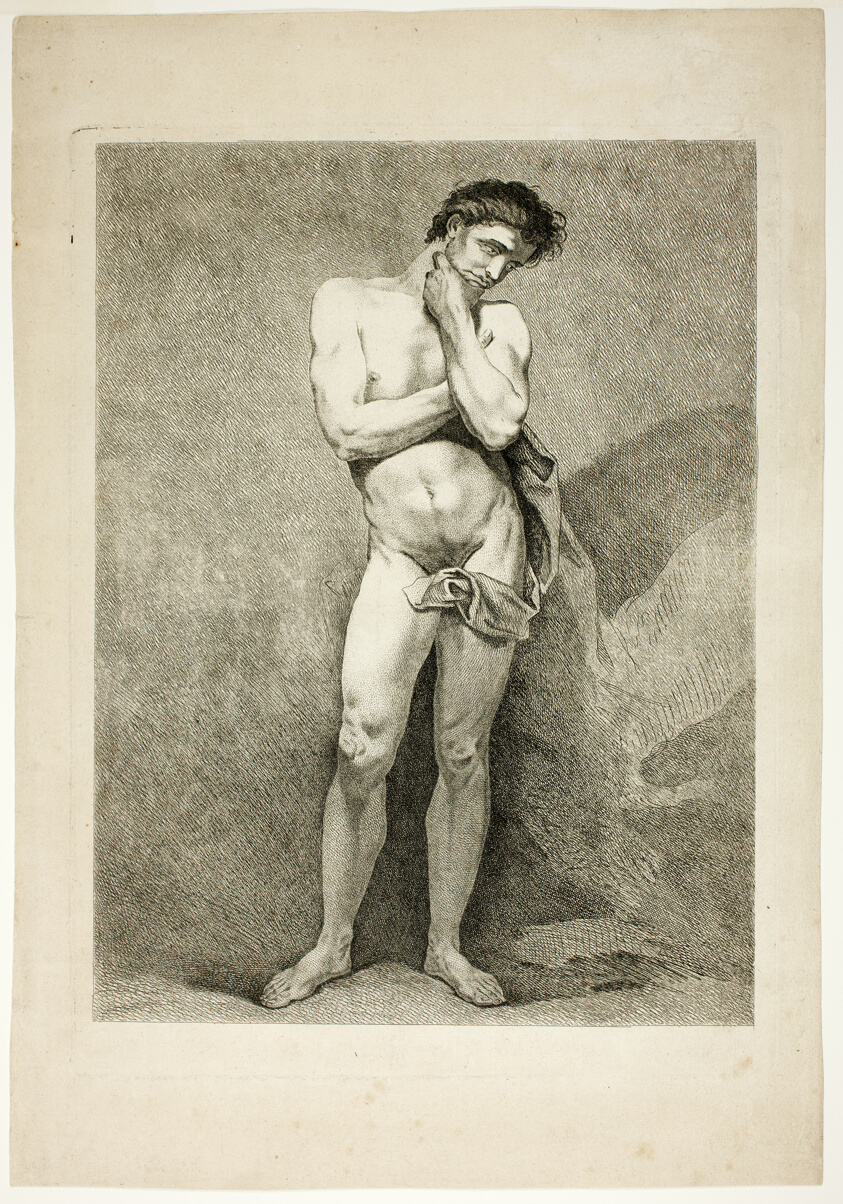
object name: Print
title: Figure, from Six Figures Académiques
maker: Carle Vanloo; French, 1705-1765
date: 1742-43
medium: Etching on cream laid paper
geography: France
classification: etching; print; prints and drawing